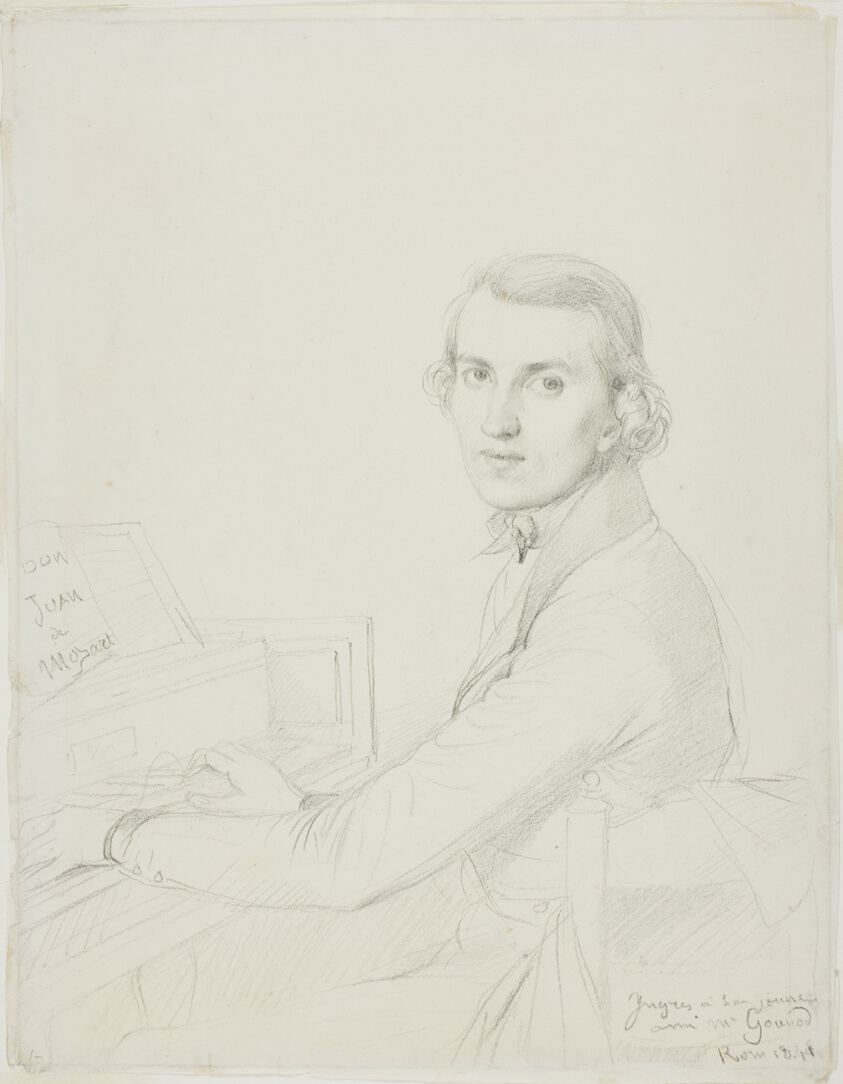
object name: Drawing and Watercolor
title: Charles Gounod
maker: Jean–Auguste–Dominique Ingres; French, 1780–1867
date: 1841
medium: Graphite on ivory wove paper, discolored to cream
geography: France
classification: graphite; drawings (visual works); prints and drawing